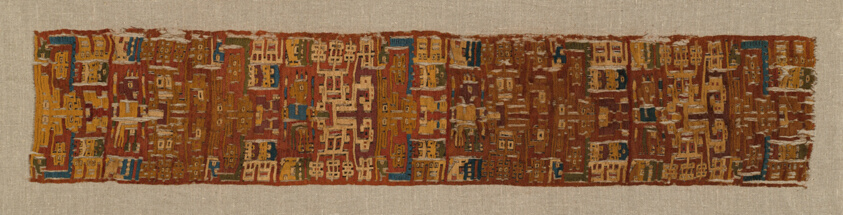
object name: Textile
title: Fragment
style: nazca, early intermediate period, americas, Pre-Columbian, andean, andes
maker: Peru, South Coast, Nazca culture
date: 200 B.C.–600 A.D.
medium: Cotton and camelid wool, slit tapestry weave with interlaced outlining wefts; edged with plain weave; parts of selvages present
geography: Peru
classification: textile; weaving